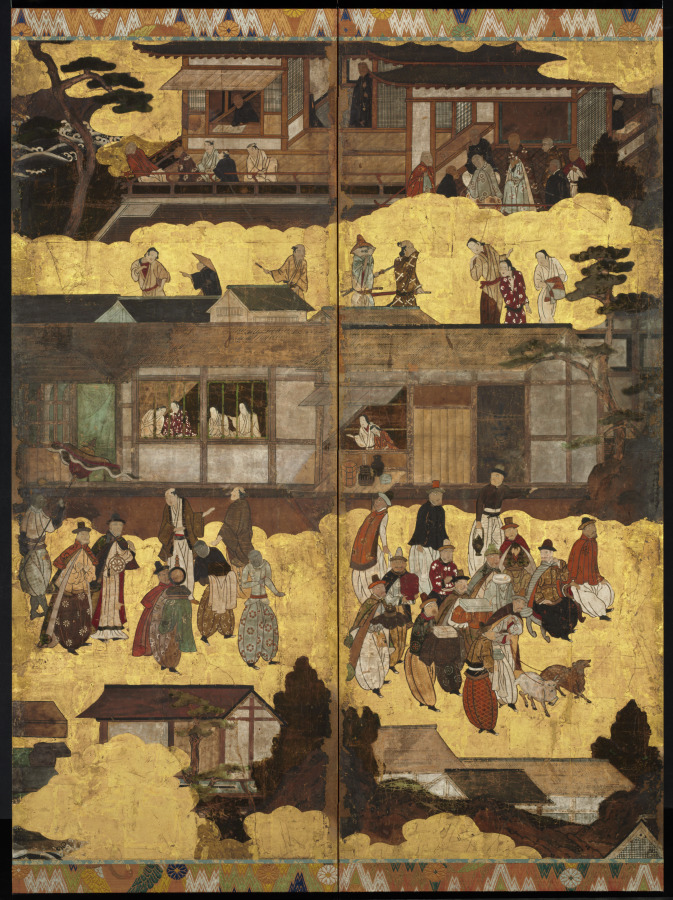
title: Arrival of the "Southern Barbarians"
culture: Japan, Momoyama period (1573–1615)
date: c. 1600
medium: One of a pair of six-panel folding screens; ink, color, and gold on paper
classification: Painting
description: This screen and its corresponding screen show Portuguese merchants arriving in Japan, having crossed the oceans in their large ship with a multinational crew. The Portuguese were known in Japan as the “Southern Barbarians” because they arrived from the south and their customs and manners were unfamiliar to the Japanese, who had not encountered anyone from Europe until their first appearance in 1543. In 1639, the Portuguese were forced out of Japan, mainly owing to internal difficulties caused by their Catholic missionaries, but they were a major conduit for both objects and ideas from Europe for nearly 100 years.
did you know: Europeans were called "Southern Barbarians" because their ships arrived in Japan from the south.